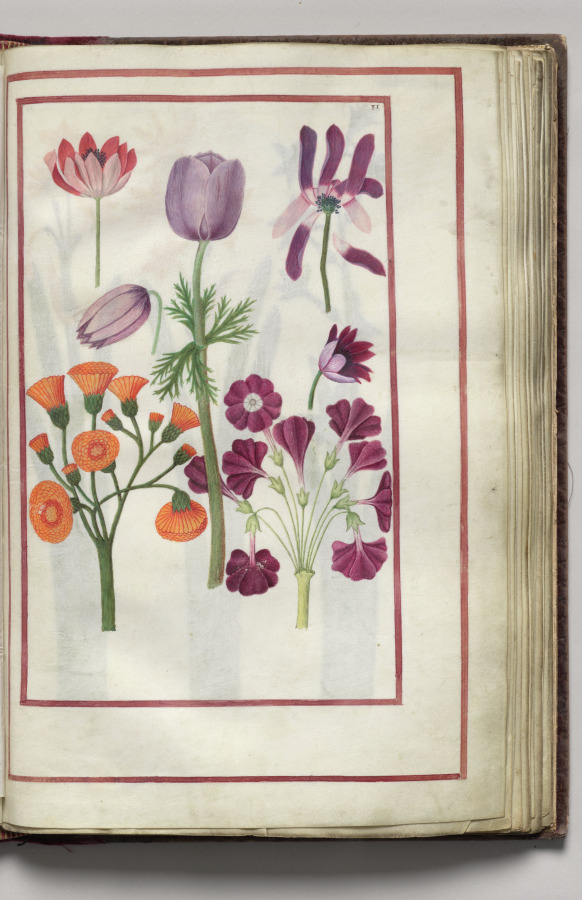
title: Anemones, folio 18 (recto), from Florilegium (A Book of Flower Studies)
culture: France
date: 1608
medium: watercolor, ink, silver, and gold over occasional traces of pencil, on vellum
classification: Bound Volume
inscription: Dated: Poitiers 1608 (on frontispiece) Signed: On frontispiece in black ink, lower right: Van Kuyk Notation on drawing: Frontispiece: in pencil, lower margin: * élève de Van Kessel, peintre flammand (* in pencil also appears in front of Van Kuyk's name).